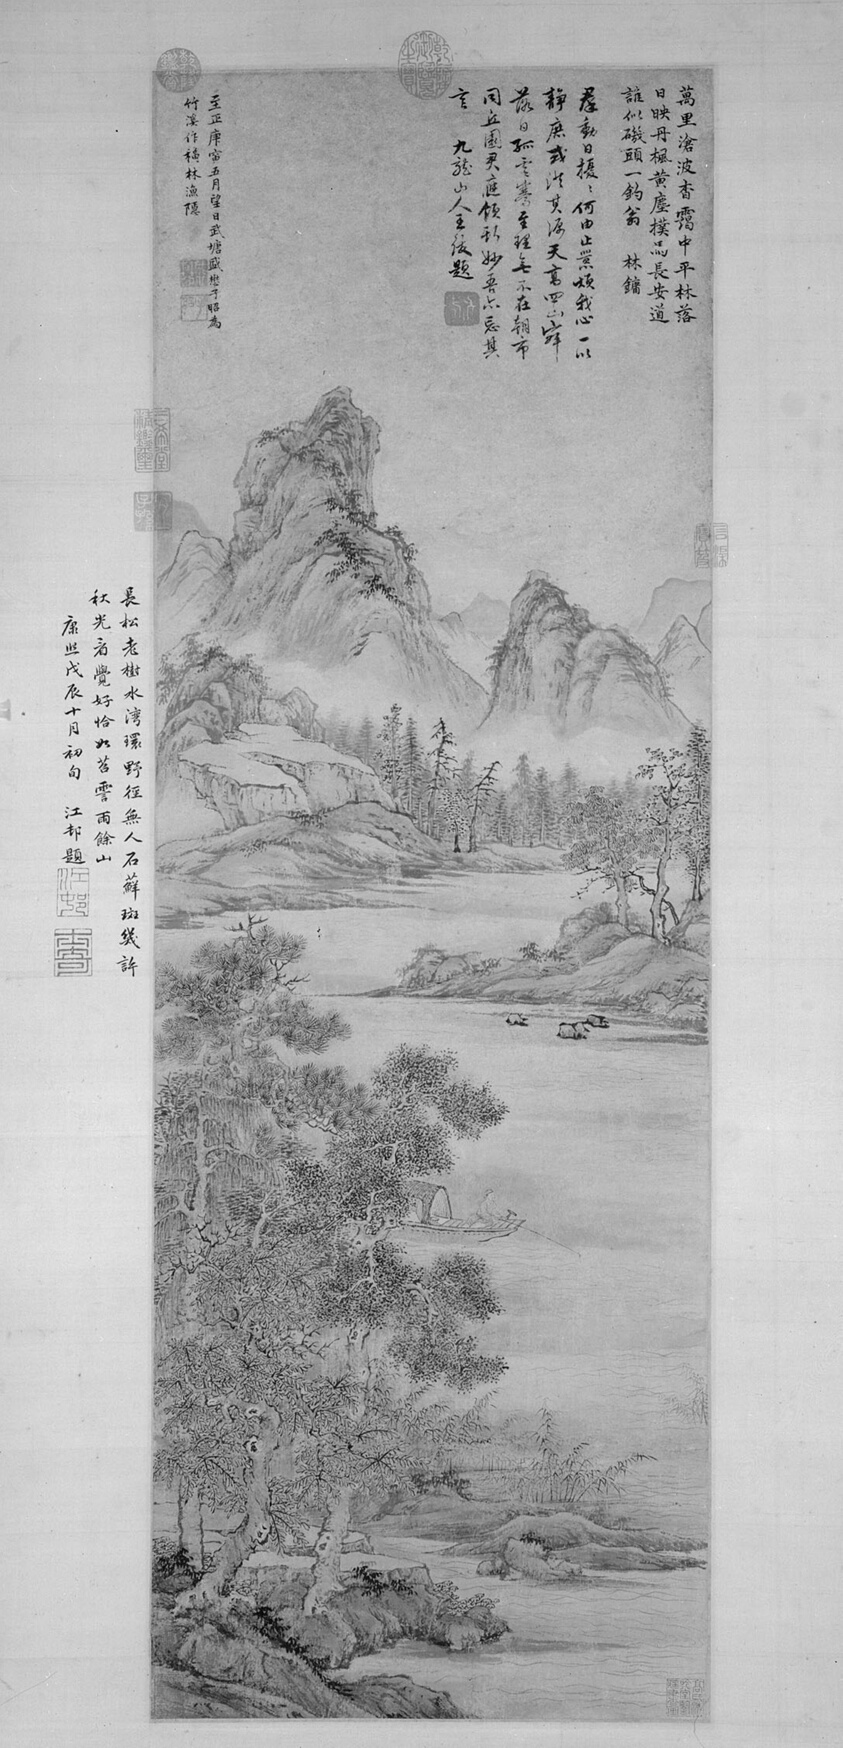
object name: Painting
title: Fishing Recluse by an Autumn Grove (秋林漁隱圖)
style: Chinese (culture or style)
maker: Sheng Mao (attributed， 盛懋); Chinese (1310-1360)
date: late Ming/early Qing dynasty, 17th century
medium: Hanging scroll, ink and color on paper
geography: China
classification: hanging scroll; painting; asian art